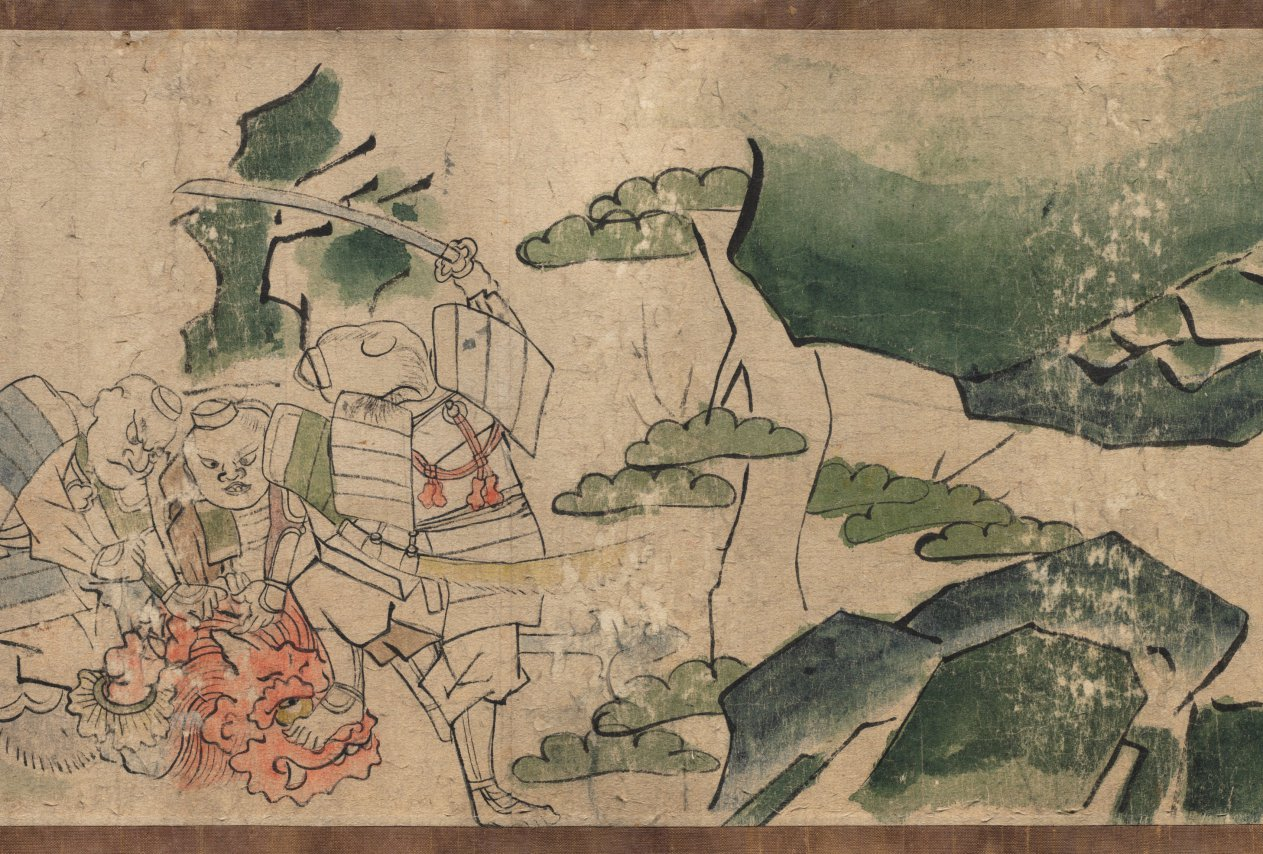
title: Oeyama Engi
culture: Japan, Edo period (1615–1868)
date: 1615–1868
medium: one of a pair of handscrolls; ink and color on paper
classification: Painting